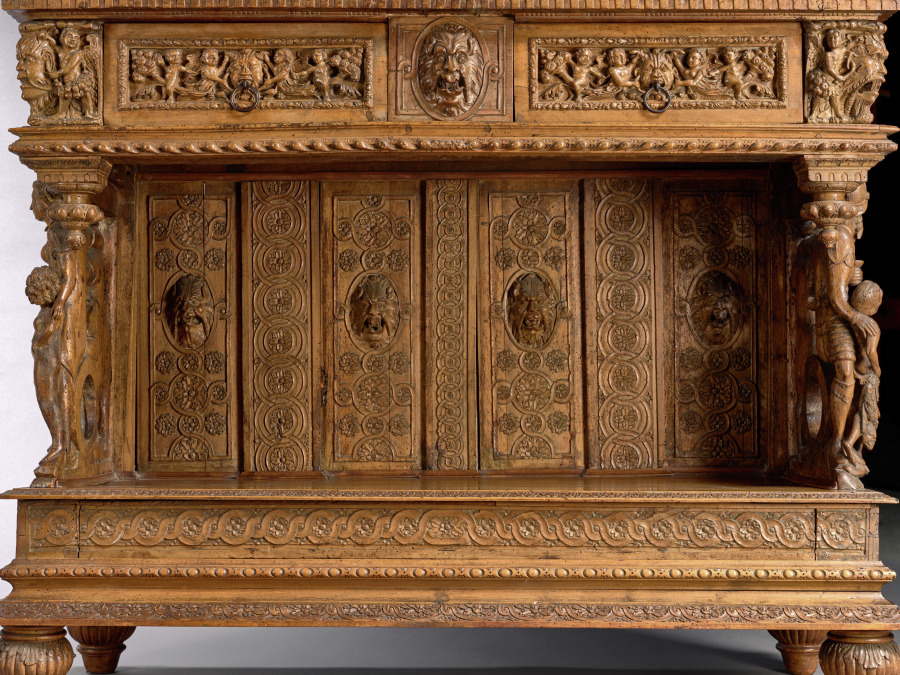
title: Dressoir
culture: France, Burgundy, 16th century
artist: style of Hugues Sambin (French, 1518–c. 1601)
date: mid 1500s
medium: walnut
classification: Furniture and woodwork